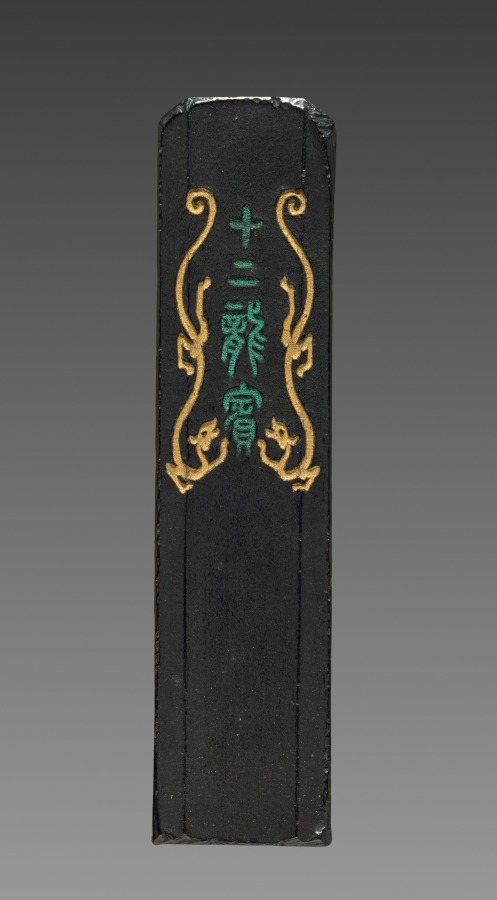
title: Ink Cake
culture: China, Qing dynasty (1644-1911)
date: 19th Century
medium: ink cake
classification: Miscellaneous